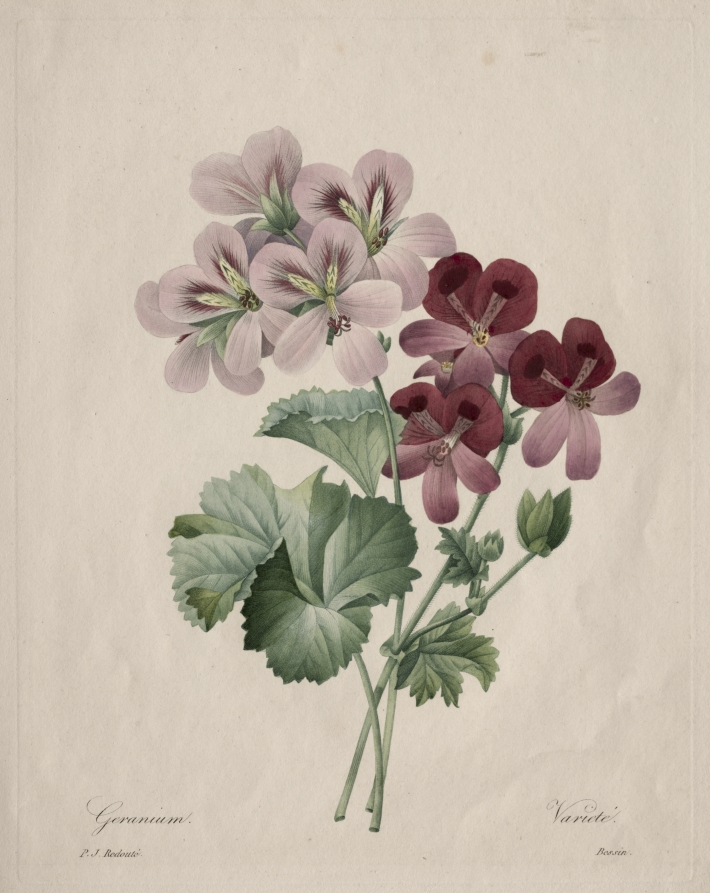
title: Geranium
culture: France, 19th century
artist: Henri Joseph Redouté (French, 1766–1853)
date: 1827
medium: stipple and roulette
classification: Print